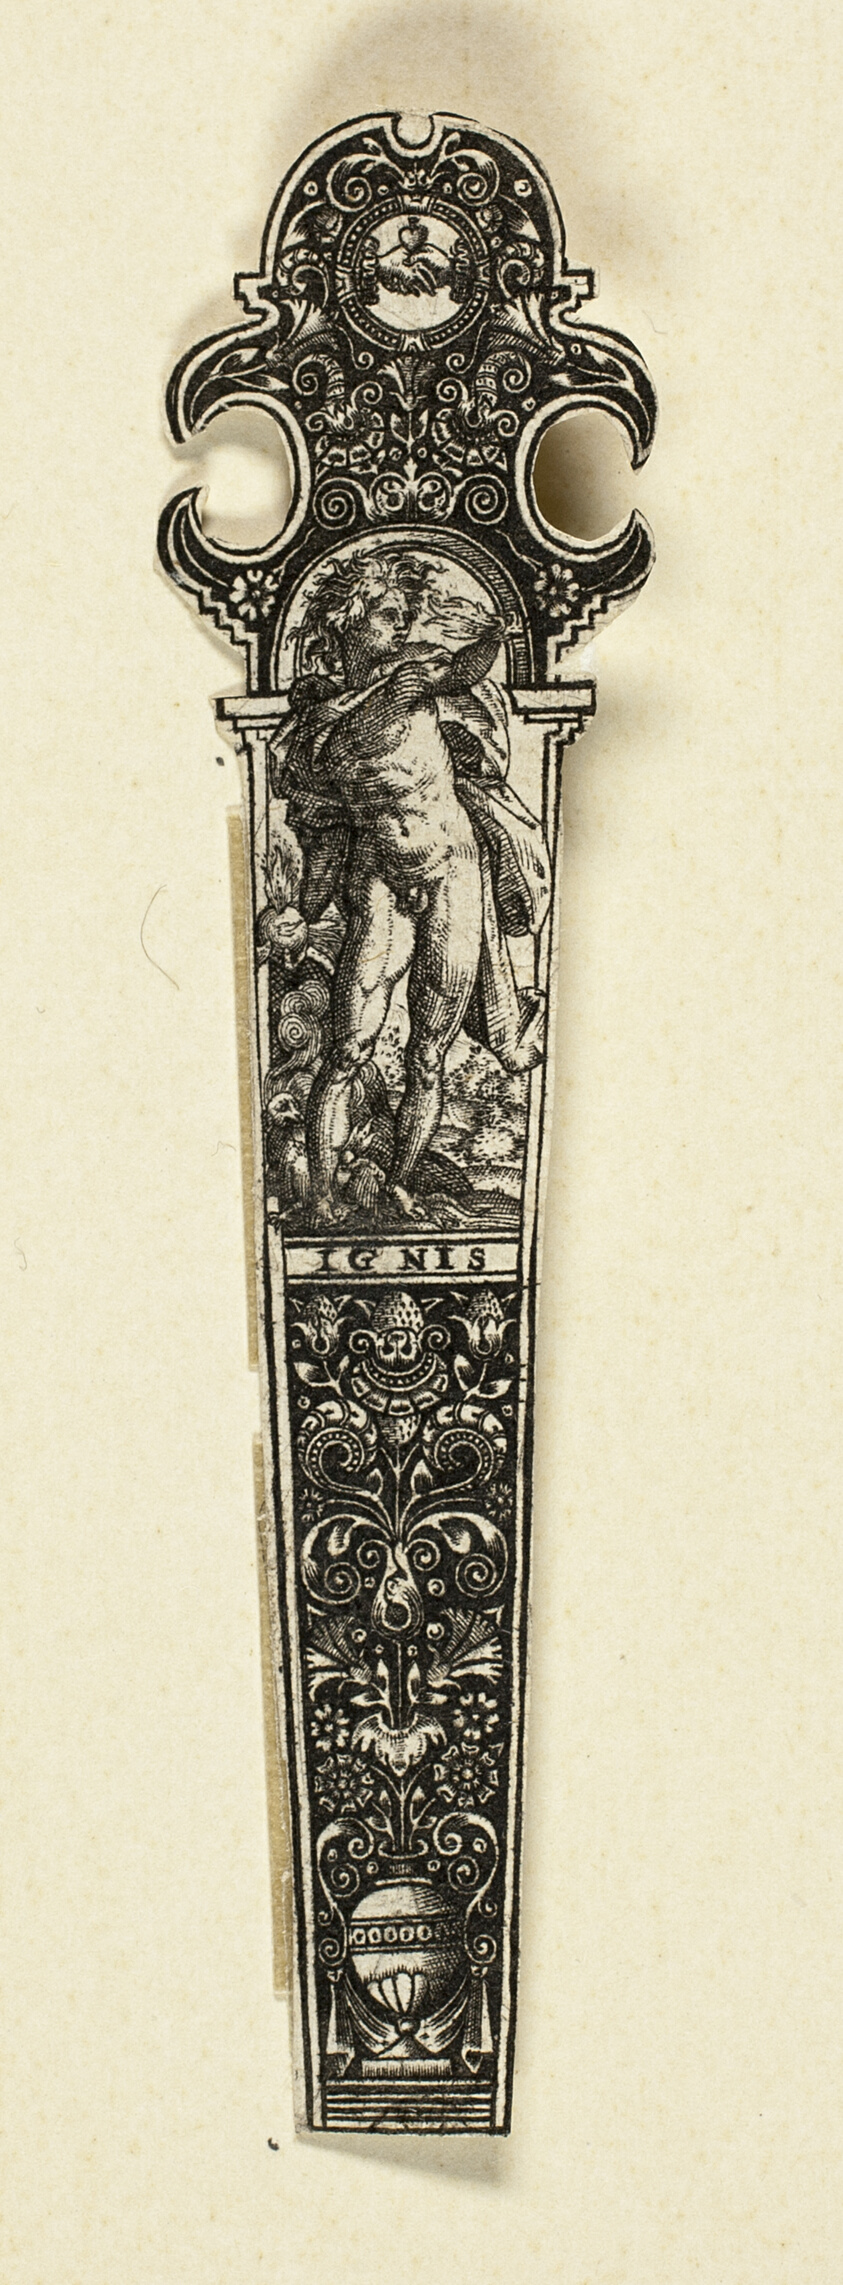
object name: Print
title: Ornamental Design for Knife Handle with Fire, from The Four Elements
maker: Johann Theodor de Bry (German, 1561-1623)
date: about 1590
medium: Engraving in black on ivory laid paper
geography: Flanders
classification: engraving; paper; print; prints and drawing